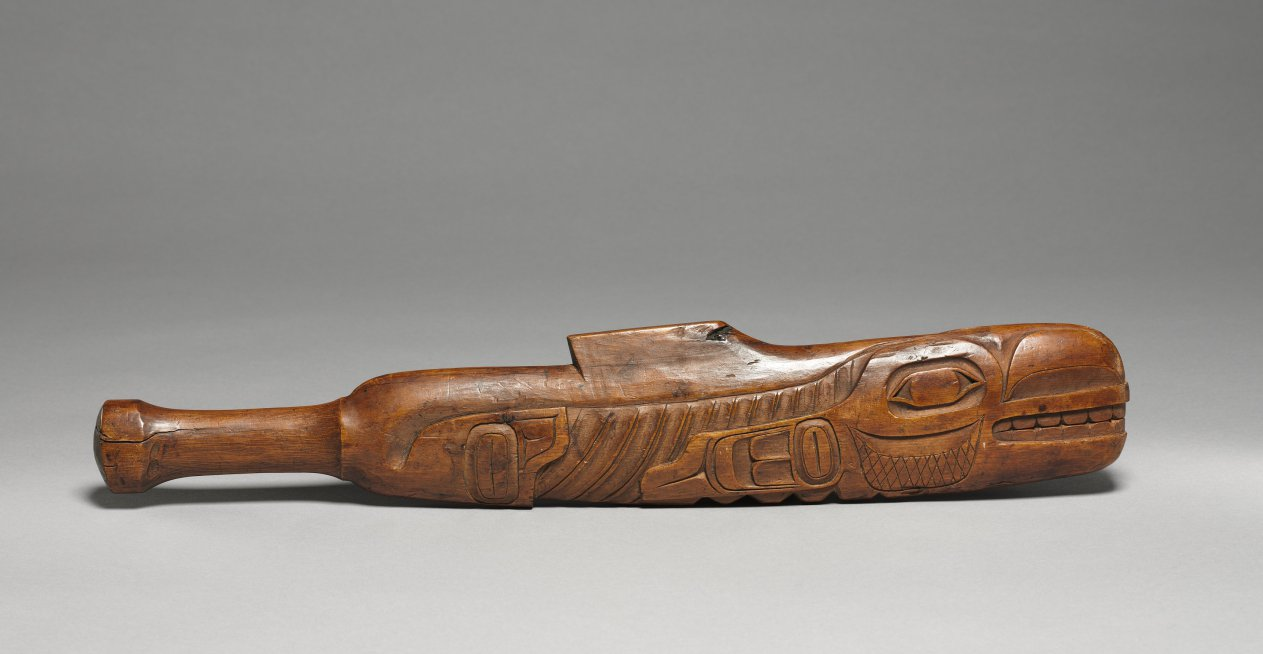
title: Fish or Seal Club (X’ús’)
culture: Native North America, Northwest Coast, Alaska, Tlingit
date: late 1800s–early 1900s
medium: wood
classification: Wood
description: Marine and river resources are crucial on the Northwest Coast, including halibut that can weigh several hundred pounds. The thrashing of such a large fish could endanger a canoe and so, after being thanked for surrendering its life, it was clubbed before being brought safely onboard. This example may represent a sea lion, a proficient hunter.